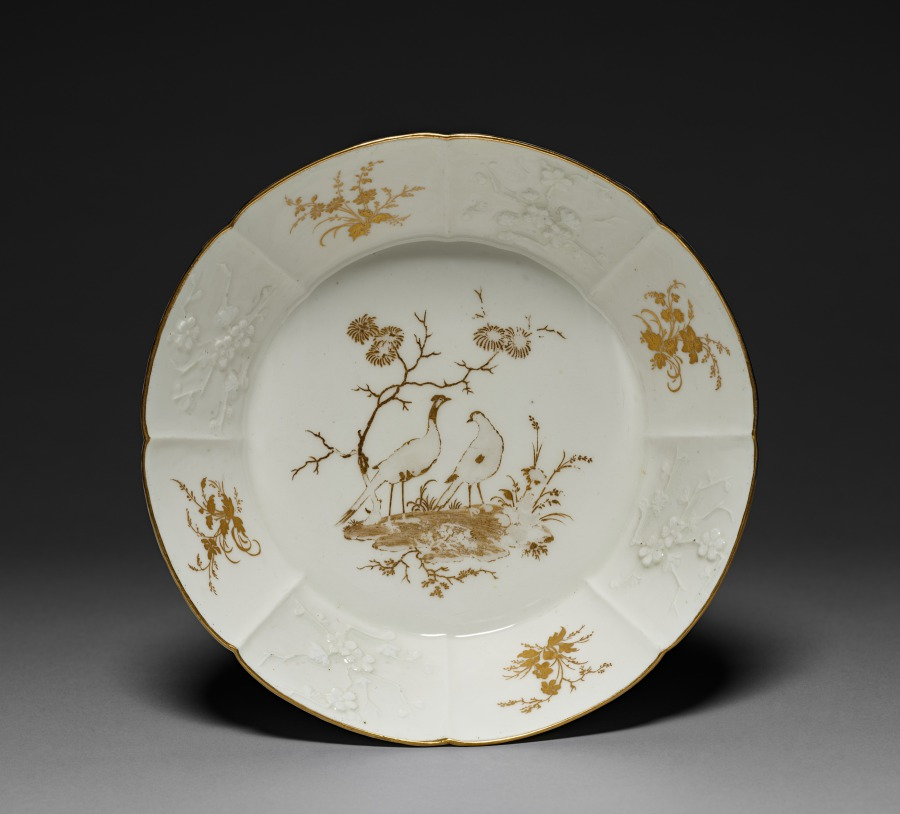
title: Saucer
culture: France, Vencennes, 18th century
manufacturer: Vincennes Porcelain Factory (France, 1740–56)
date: c. 1750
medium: soft-paste porcelain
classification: Ceramic